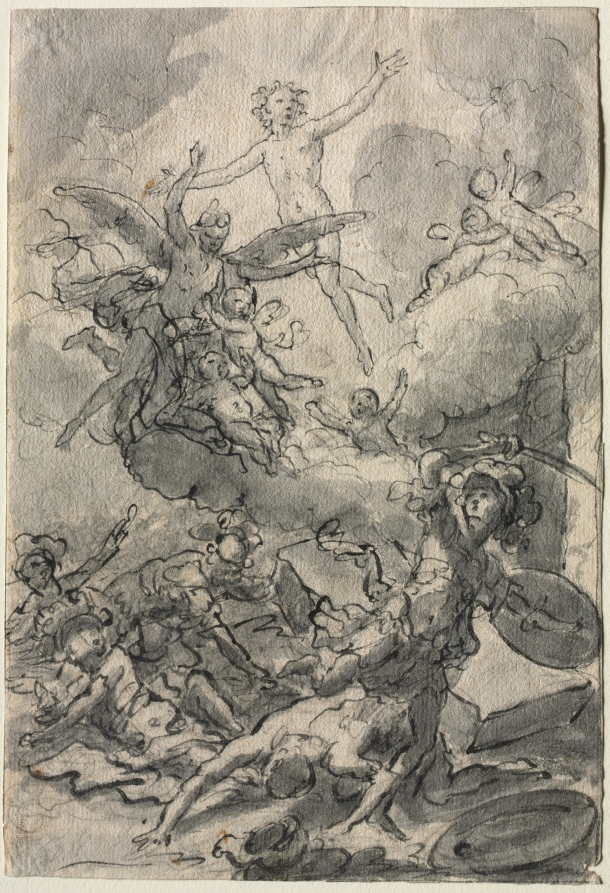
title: The Resurrection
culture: Germany, 18th century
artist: Martin Johann Schmidt (Austrian, 1718–1801)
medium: pen and brush and gray ink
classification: Drawing